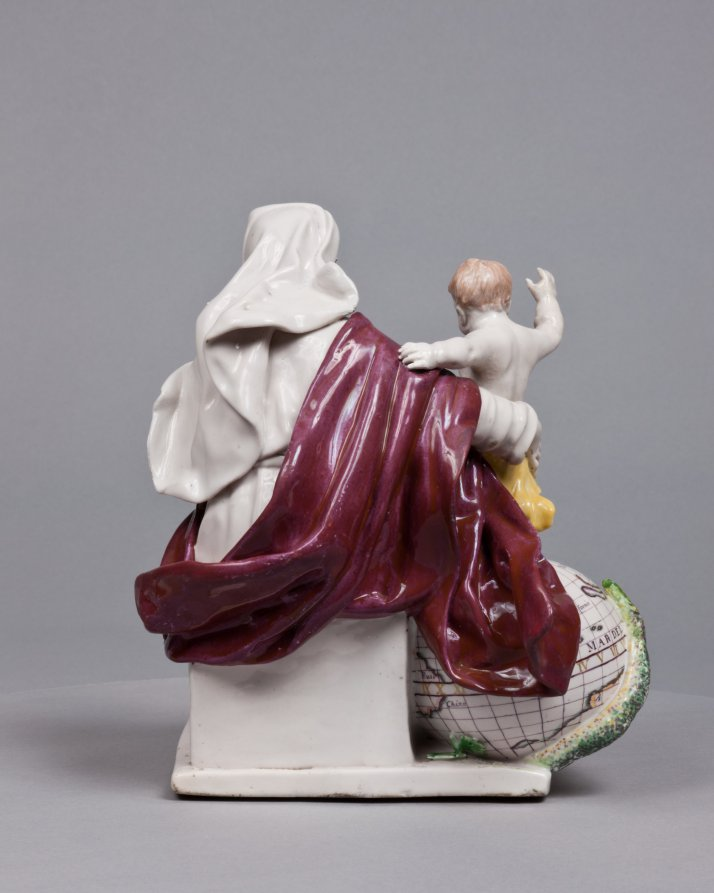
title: Madonna and Child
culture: England, Chelsea, 18th century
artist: Chelsea Porcelain Factory (Britain, London, 1745–84)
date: c. 1755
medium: porcelain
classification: Ceramic